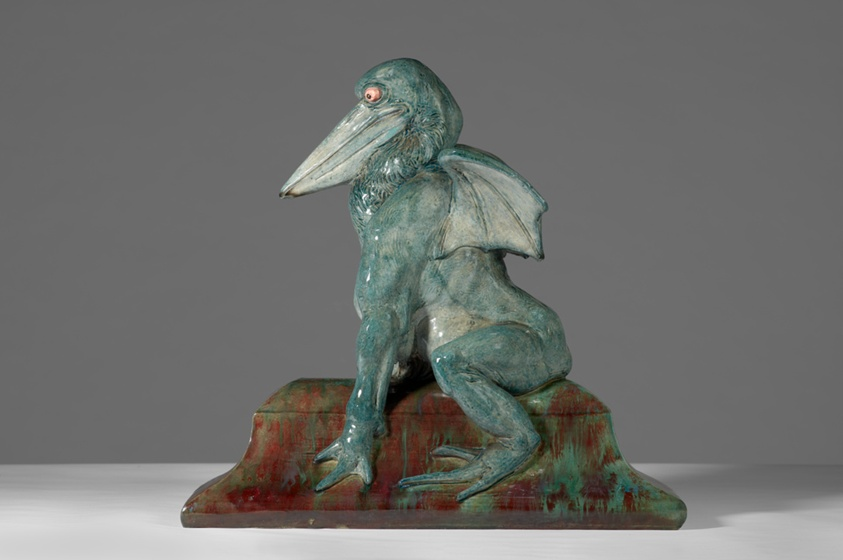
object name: Ceramics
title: Pelican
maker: Emmanuel Fremiet, French, 1824–1910; Made by Émile Muller et Cie, Ivry-sur-Seine, France, 1854–1908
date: c. 1896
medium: Glazed stoneware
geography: France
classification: sculpture; ceramics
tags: mythological figures, animals, bird, pelican, wings